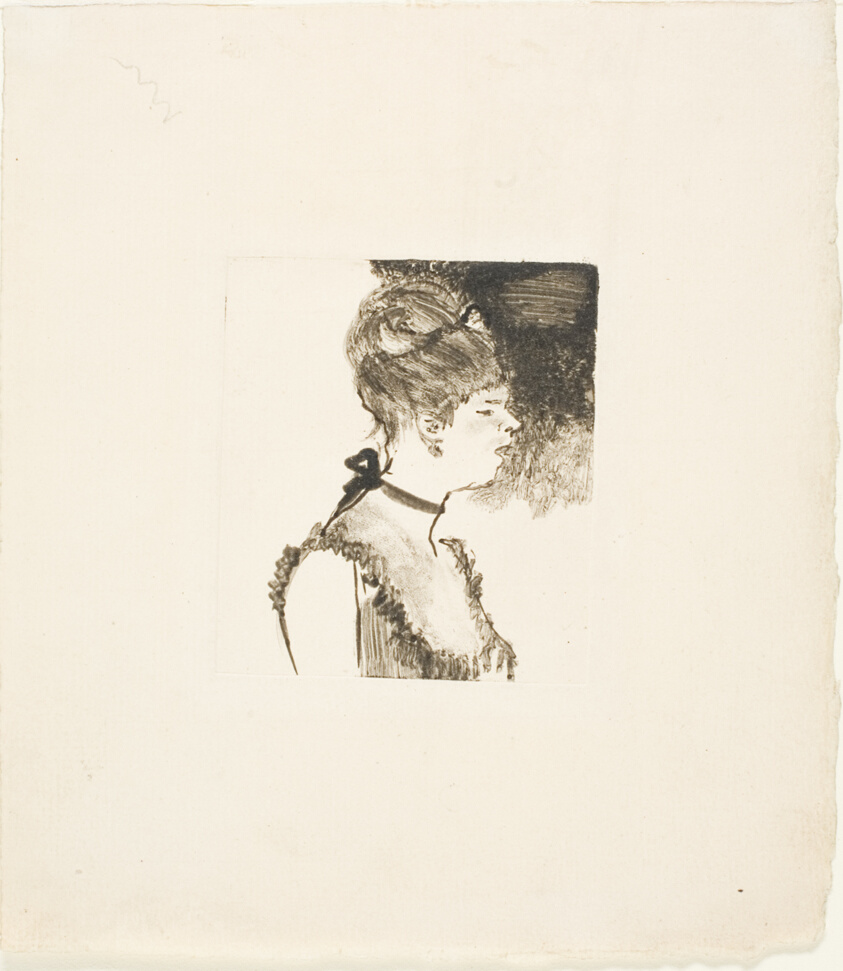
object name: Print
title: Café-Concert Singer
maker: Edgar Degas; French, 1834-1917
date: 1878/80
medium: Monotype in black ink on cream laid paper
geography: France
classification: monotype; print; prints and drawing; paper